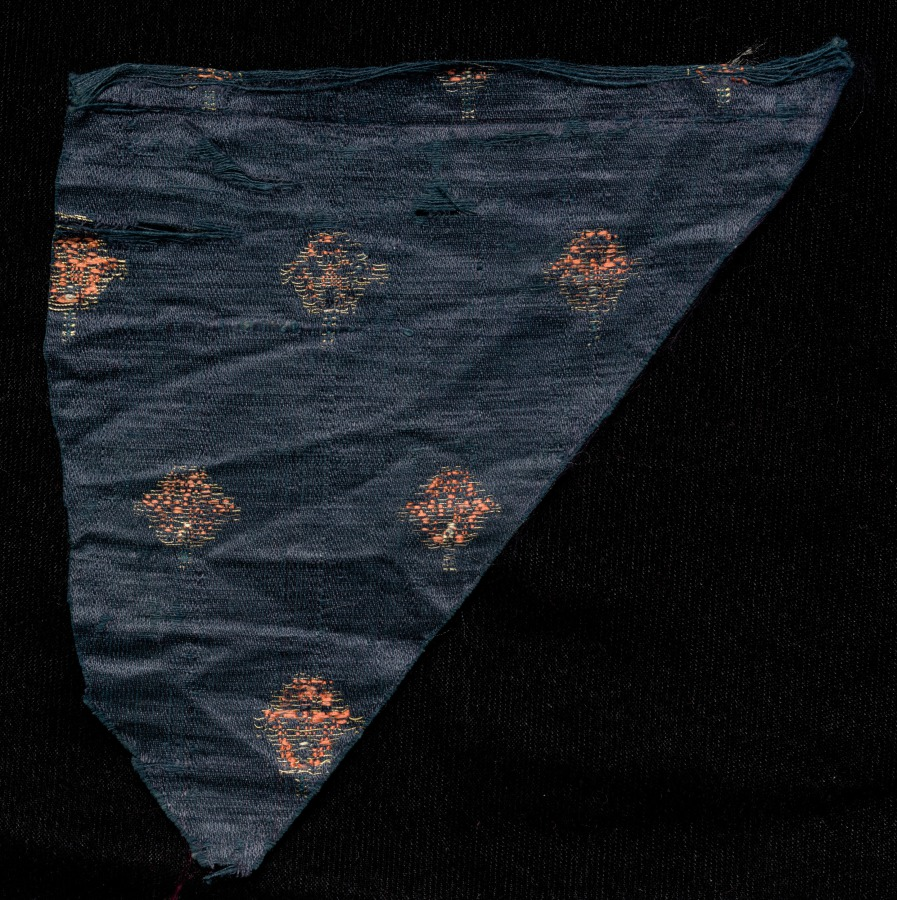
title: Brocade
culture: India, 19th century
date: 1800s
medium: brocade; silk and metal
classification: Textile